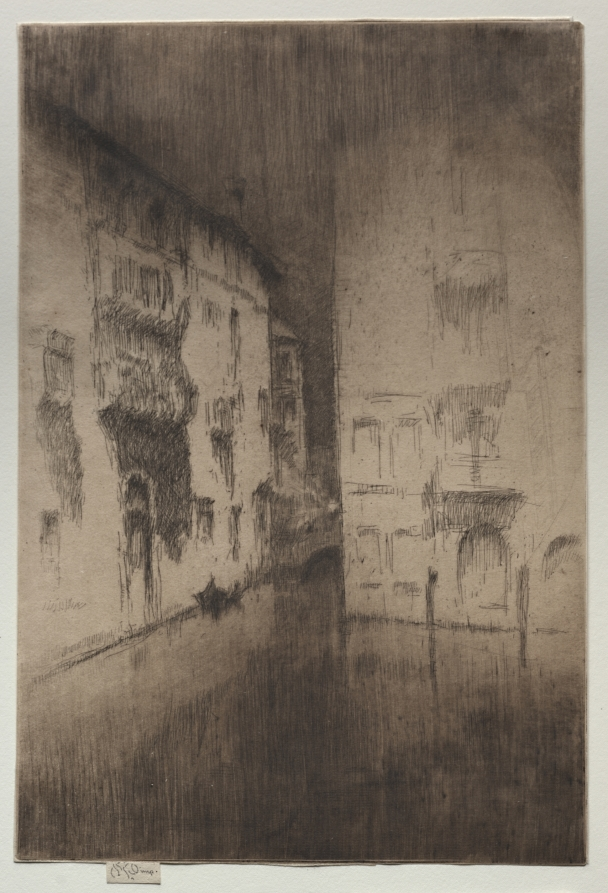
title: Nocturne: Palaces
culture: America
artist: James McNeill Whistler (American, 1834–1903)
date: 1879–80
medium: etching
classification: Print